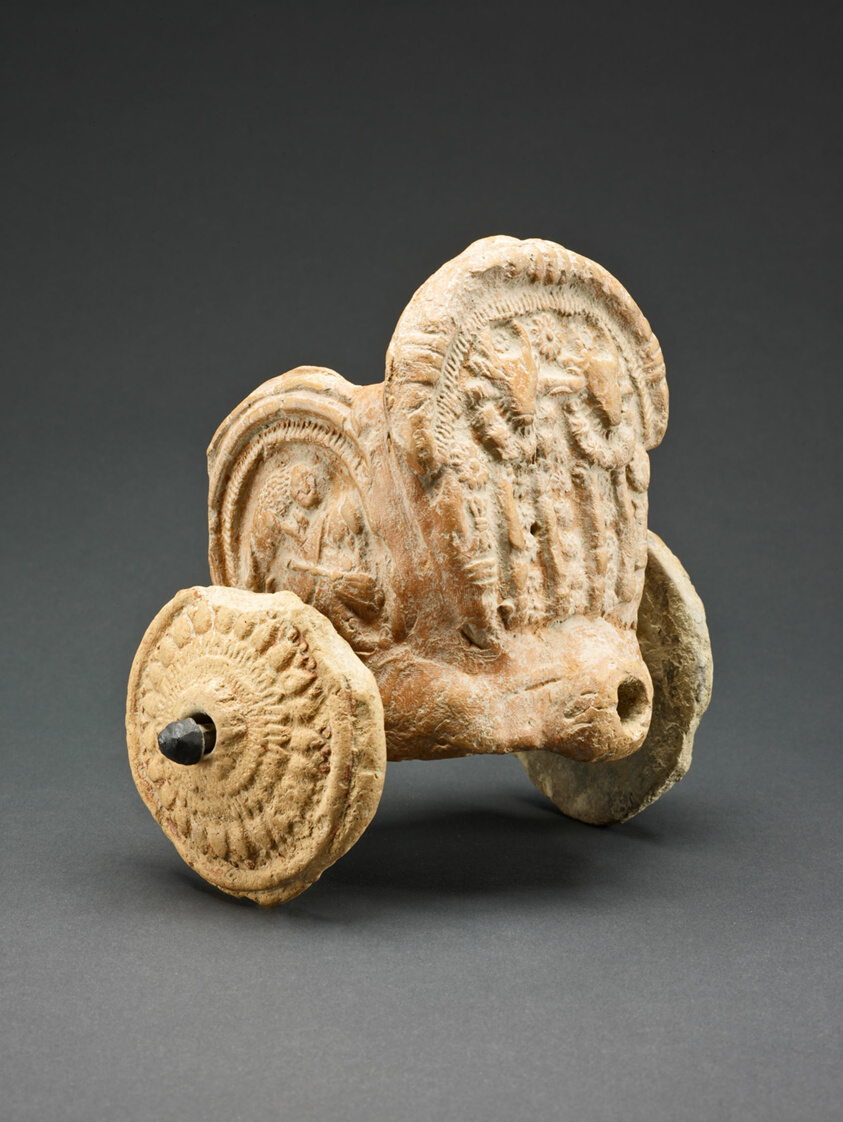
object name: Sculpture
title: Toy Cart with Lion Charging a Warrior on the Side and Wheels with Lotus Motifs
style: South Asian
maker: India; Uttar Pradesh, Kaushambi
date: 1st century B.C.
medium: Partially molded terracotta with red slip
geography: Uttar Pradesh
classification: earthenware; ceramics; sculpture; asian art